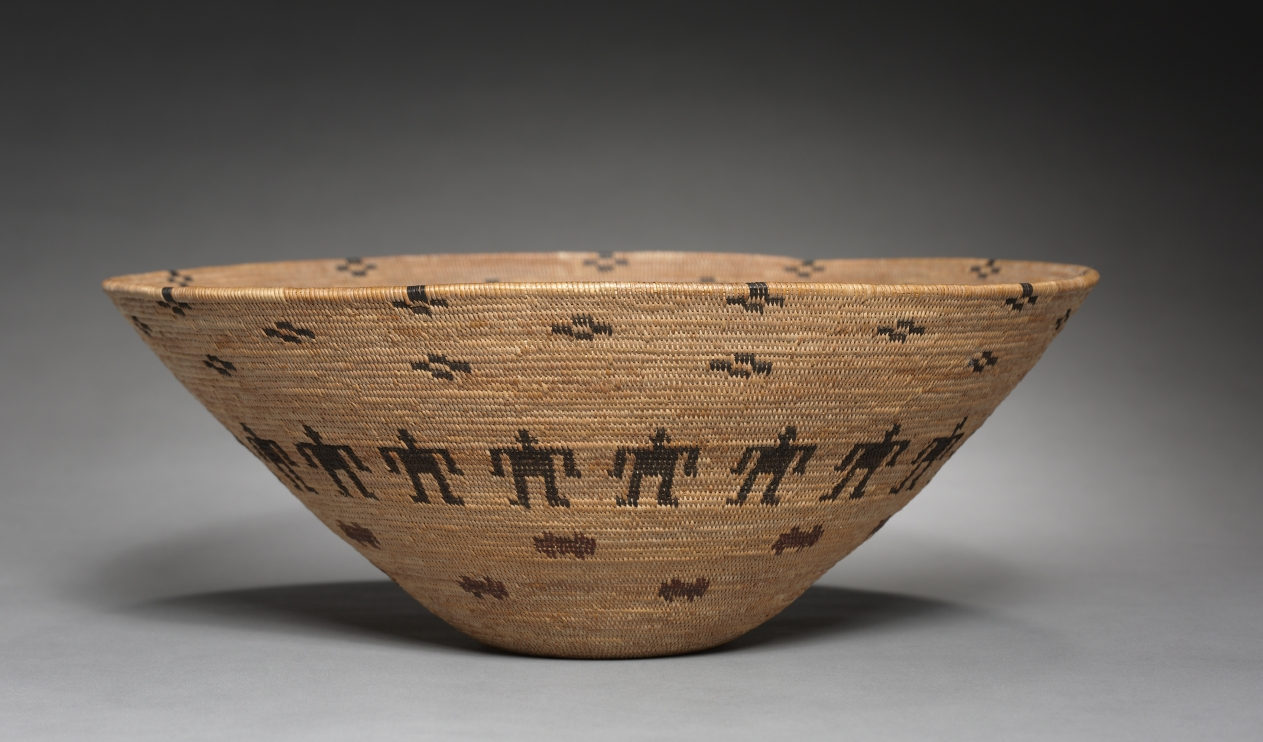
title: Bowl Basket (Unfinished)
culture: California, Yokuts, late 19th- early 20th century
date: 1895–1900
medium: Redbud, sedge, bracken fern; coiled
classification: Basketry